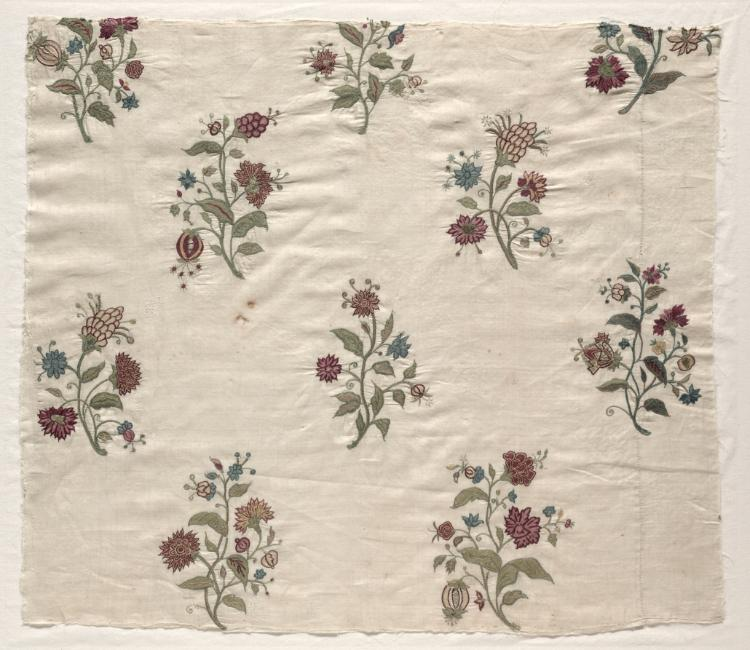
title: Embroidered Cover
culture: France, 18th century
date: 1700s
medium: embroidery, silk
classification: Embroidery